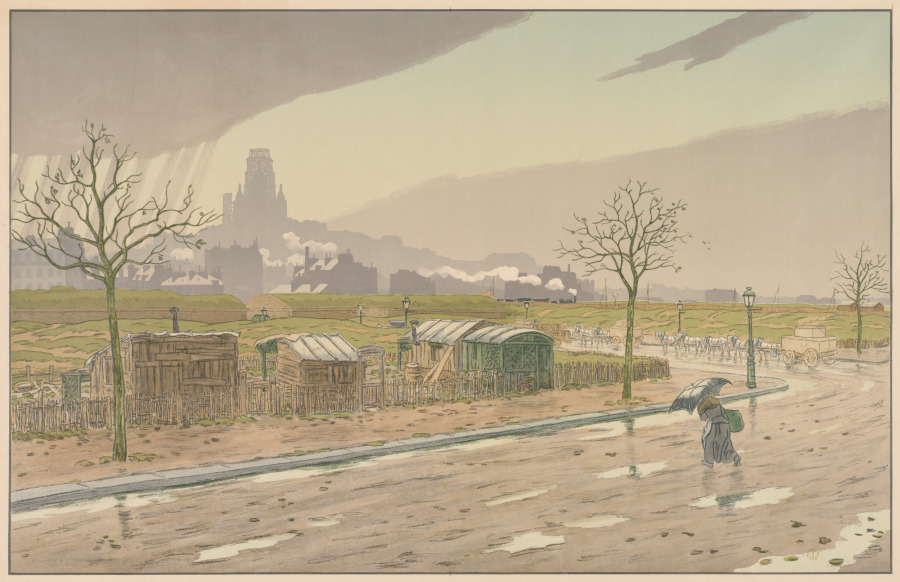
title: Parisian Landscapes: The Fortifications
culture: France, early 20th century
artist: Henri Rivière (French, 1864–1951)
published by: Printed by Verneau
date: 1900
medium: color lithograph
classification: Print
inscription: lower margin, in graphite: inscription; lower edge in graphite: publisher's information